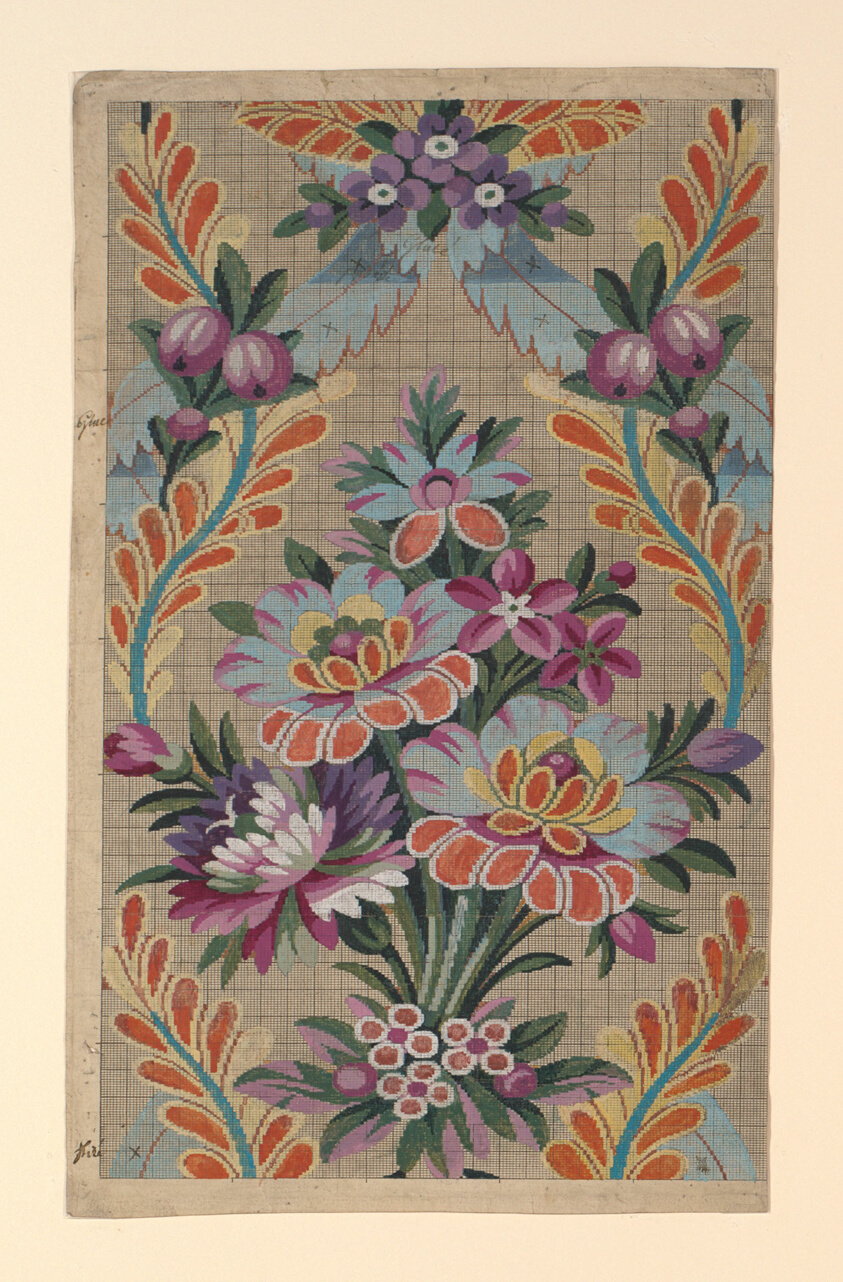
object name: Drawing and Watercolor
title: Mise-en-carte (Point-paper)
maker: France, Lyon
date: 1760/90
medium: Ink and gouache on hand drawn graph paper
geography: France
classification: textile; accessory - paper design